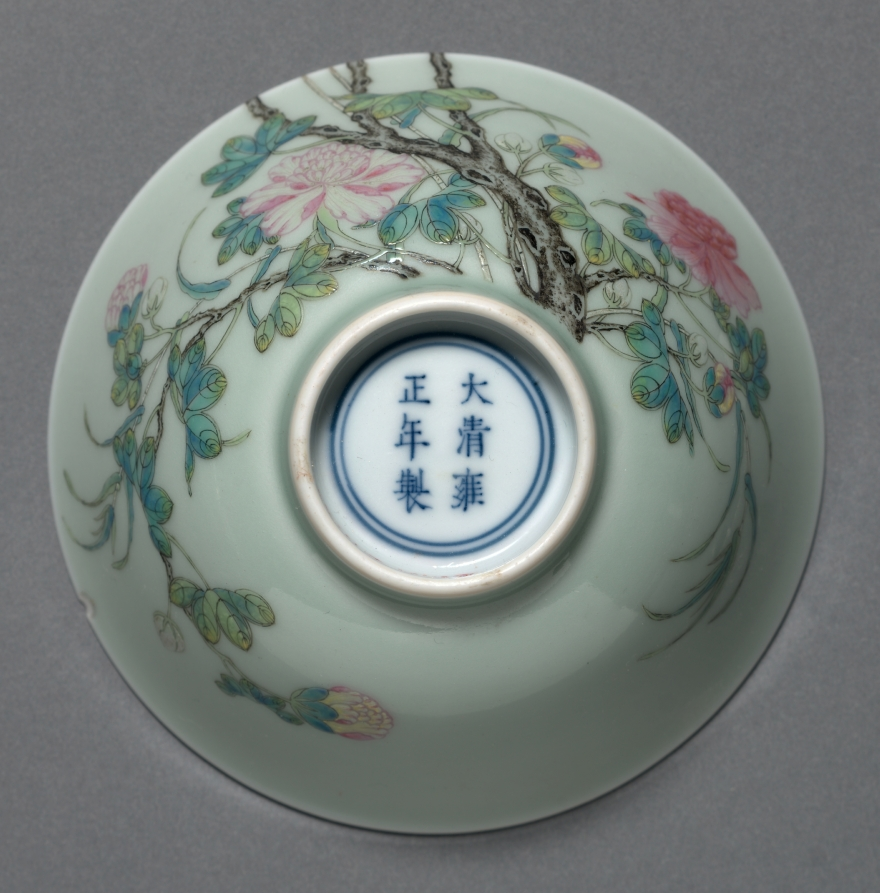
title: Bowl with Bamboo, Tree Peony, and Swallow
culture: China, Jiangxi province, Jingdezhen kilns, Qing dynasty (1644-1911), Yongzheng mark and reign (1723-35)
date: 1723–35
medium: porcelain with famille rose overglaze enamel decoration and celadon glaze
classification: Ceramic